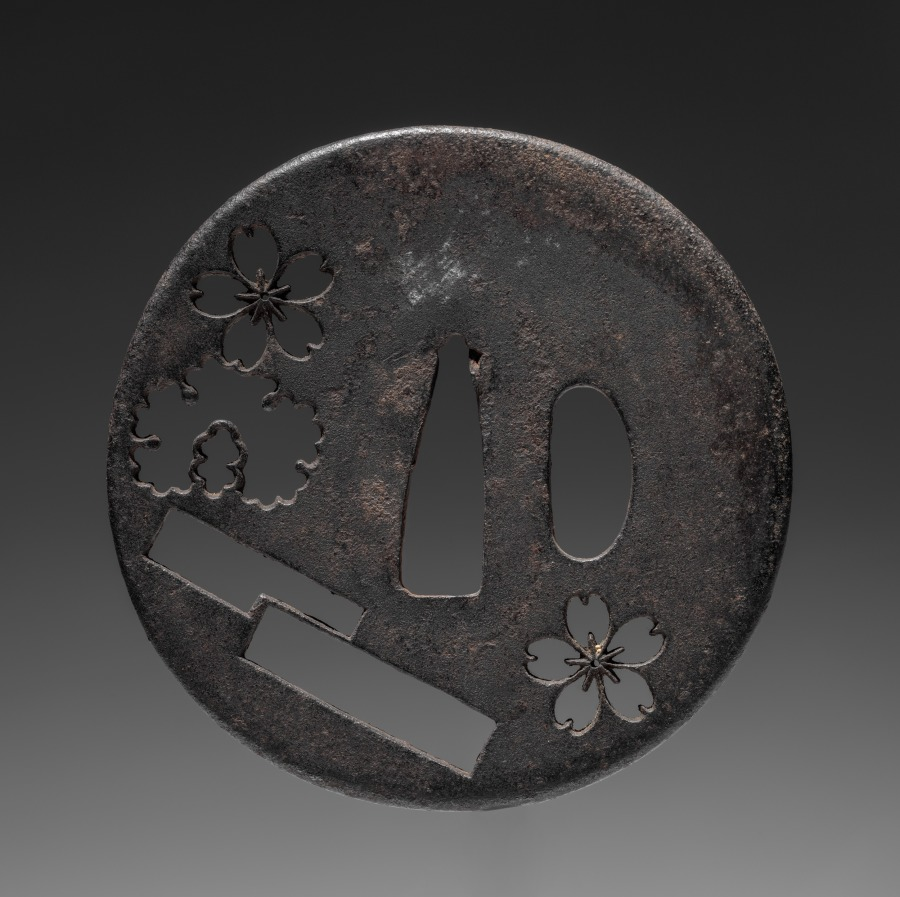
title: Sword Guard (Tsuba)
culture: Japan, possibly Edo period (1615-1868)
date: c. 1615–1868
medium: iron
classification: Arms and Armor